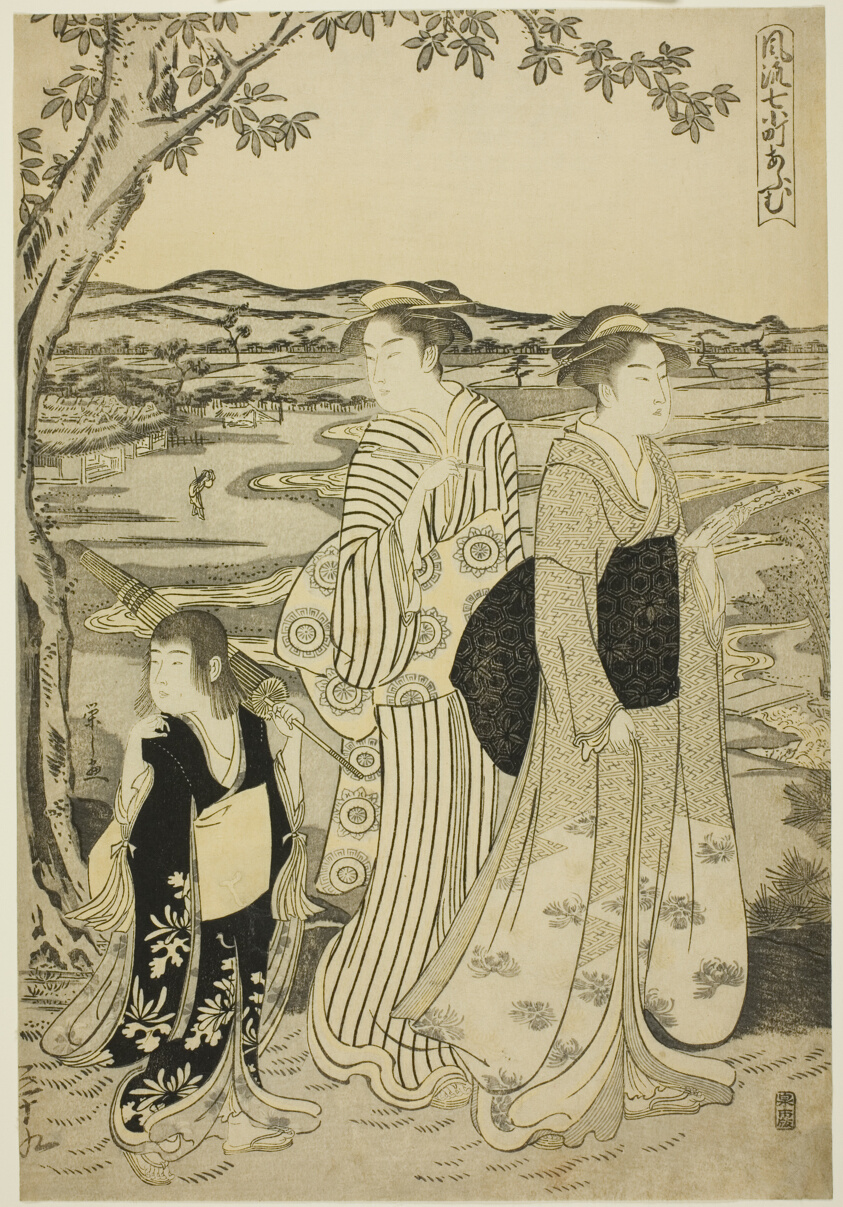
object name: Print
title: Parrot Komachi, from the series The Fashionable Seven Komachi (Furyu nana Komachi)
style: Japanese (culture or style)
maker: Chobunsai Eishi; Japanese, 1756 –1829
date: Edo period (1615–1868), about 1788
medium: Color woodblock print; oban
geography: Japan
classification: woodblock print; print; asian art